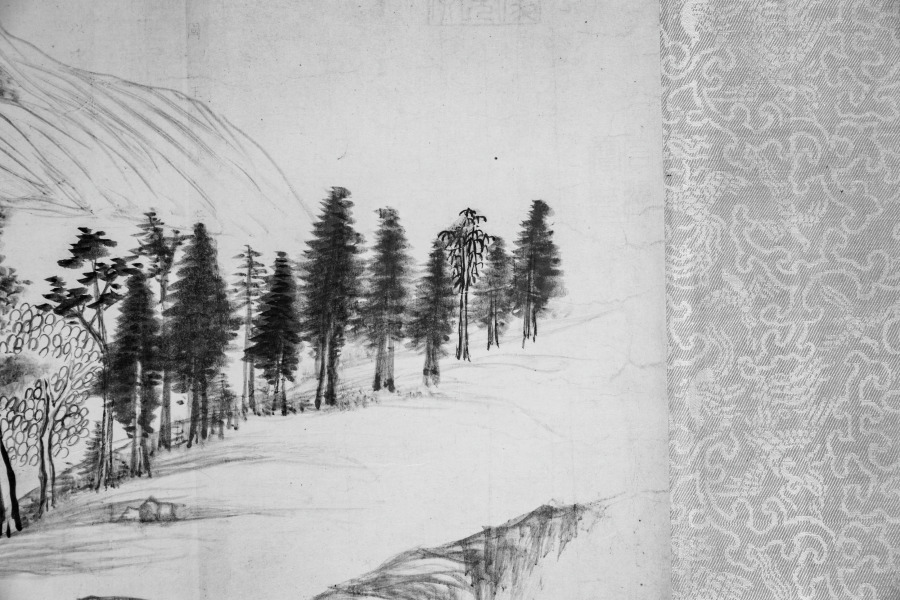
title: River and Mountains on a Clear Autumn Day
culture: China, Ming dynasty (1368–1644)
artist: Dong Qichang (Chinese, 1555–1636)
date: c. 1624–27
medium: Handscroll; ink on Korean paper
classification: Painting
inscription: 黃子久江山秋霽似此，當恨古人不見我也。思翁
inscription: 董文敏每遇高麗鏡面箋，書畫尤為入神。此卷改表紙用之，字跡隱然，兼有朝鮮之印。至於筆法圓秀，真接倪黃。豈文沈所可同日而語也。 康熙庚午中秋後一日，天氣澄爽，重裝初畢，跋於瓶廬。抱瓮翁高士奇。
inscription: Second inscription by Gao Shiqi 高士奇 (1645–1704): On the twenty-third day of the ninth month, the jiaxu year of the Kangxi era [1694], I packed my bags to head north. When my boat passed Wuchang [Suzhou], Mr. Mantang [Song Luo] brought wine to bid me farewell so that we could share our thoughts on our separation in the last few years. I showed him the paintings and calligraphy which I collected and asked his opinions. Since Mr. Mantang does not own any handscrolls by Wenmin [Dong Qichang], I leave this one for him in commemoration of our parting; thus the painting will have a worthy owner and our meeting will become a beautiful story in the future. It is the fourth day after the beginning of winter, with the sky clear and sober. Trees under frost have turned red and yellow, seemingly echoing the brush and ink in the painting. I also ask Mr. Mantang to inscribe a poem to commemorate our meeting so that it will survive forever.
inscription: 1 colophon and 4 seals of Song Luo 宋犖 (1634–1713): Who is the foremost art connoisseur of our dynasty?/ Tangcun [Liang Qingbiao, 1620–1691] is dead, so the title passes to Jiangcun [Gao Shiqi]./ Leaving office, you retired for five years in the Lake region./ Fondling handscrolls and hanging scrolls from morning to evening./ You sent me your collection catalogue Xiao Xia Lu last year;/ It is indeed the true equal of [Zhou Mi's] Yun Yan Guo Yan./ This year you returned to the capital by imperial order;/ Your boat with calligraphy and paintings anchored at the river bank in Suzhou./ When we met each other you did not waste any time for conversation by poured out immediately/ From your "coral net" extraordinary treasures./ You produced incomparable scrolls, with gold-inscribed labels and jade rollers,/ Pouring out from bags and trunks, they were spread in disarray./ Without a word, I rolled and unrolled until my fingers were numbed,/ We sat straight, facing each other quietly, and never felt tired./ For three days we forgot about sleeping and food./ And at times we shouted our joy out loud, forgetting who is host or guest./ Your Dwelling in the Fuchun Mountains and the Yuansheng manuscript/ These peerless works I myself examined with delight./ As an added pleasure to the farewell dinner under the Maple Bridge,/ You allowed me to hold again this handscroll by Dong Qichang--/ The Misty River and Piled Peaks [by Zhao Mengfu] and this Clear Autumn Day are two extraordinary masterpieces./ In showing such life and spirit with "qi yun." the artists were truly "men of heaven."/ The Clear Autumn Day is not even three feet long,/ Painted on tributary Korean paper, it shines like silver./ Every building up and every turn of the mountains imitates nature,/ Every tree and every rock is removed from the commonplace./ From the beginning, the theory of poetry is the theory of painting,/ Like the lotus and the morning sunshine, they complement and refresh each other./ The artist's inscription regrets that "the Old Masters cannot see my scroll."/ Huang Gongwang would have agreed in his grave./ The vermilion of the seals glitter and dazzles the eyes,/ These added accessories are as valuable as jade./ You are very kind to give it to me,/ The feelings expressed in your inscription are so sincere./ Wanting to refuse, but unable, I accept it to respect your wish,/ And taking off my gown and cap I wrapped it with care./ You asked me to write a long poem in commemoration of this beautiful occasion,/ I am too ashamed that my effort in response is so poor and inadequate./ Returning home, I unrolled it under candlelight, trying to write the colophon,/ The light of the waning moon shines at the foot of the mossy wall./ Earnestly humming and brows knit in deep thought, I try to compose;/ The verses are not outstanding, but the facts are real./ With this poem recorded at the end of the scroll, I mail it to you for approval,/ This poem and this painting shall outlast a thousand springs. (Translation by LYSL/HK/WKH)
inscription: 1 colophon and 2 seals of Shao Changheng 邵長蘅 (1637–1704); 2 inscriptions and 14 seals of the Qianlong 乾隆 emperor (r. 1736–95); 1 seal of the Jiaqing 嘉慶 emperor (r. 1796–1820); 3 seals of the Xuantong 宣統 emperor (r. 1908–11); 1 seal unidentified.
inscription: [印] 朝鮮國王之印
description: Dong Qichang had a tremendous impact on the artistic practices and historiography of later generations; his works and writings shaped literati aesthetics. Here, Dong places an abstract landscape composition diagonally across the picture plane, configured to recall earlier masters and simultaneously express his own personal style. Dong’s inscription claims, Huang Gongwang’s Autumn Day, looks like this. I truly regret the master has not seen my work. In fact, Dong Qichang may have had Dong Yuan’s Xiao and Xiang Rivers in mind, a work he owned and considered a key work in Chinese art history.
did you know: The painting has an imprint of a Korean seal that reads "Seal of the king of Joseon."